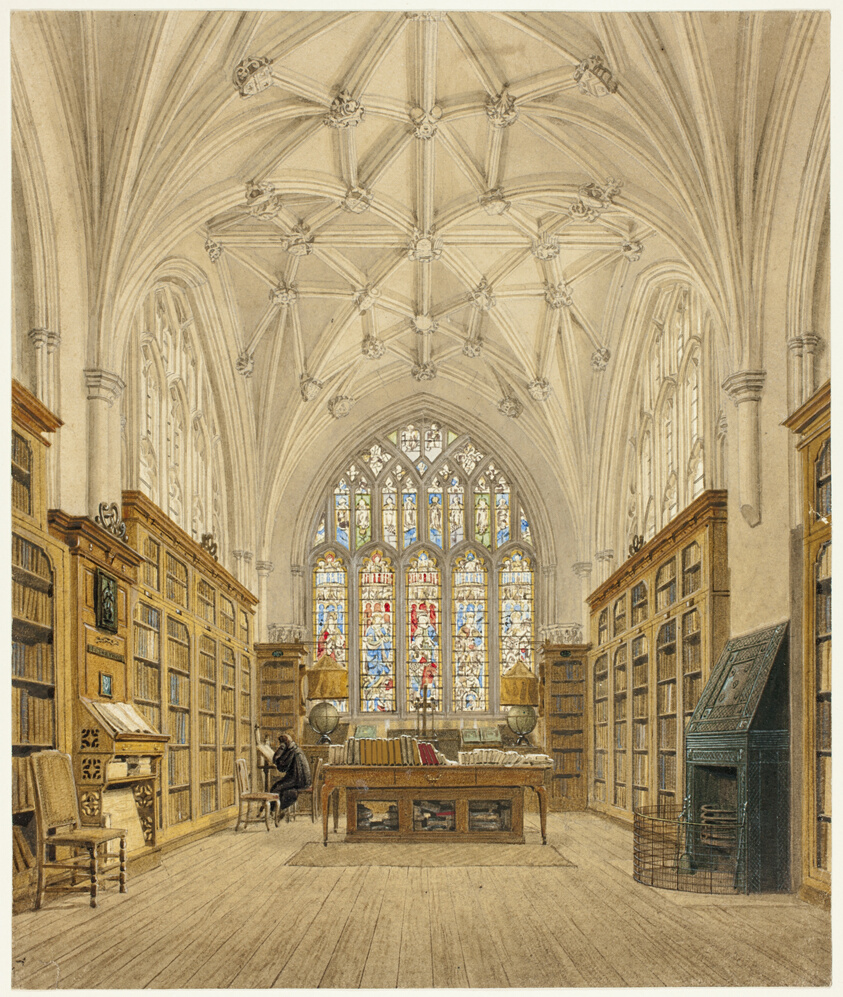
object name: Drawing and Watercolor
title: Library of Winchester College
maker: Frederick MacKenzie (English, born Scotland, 1787-1854)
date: c. 1816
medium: Watercolor, with touches of gouache, heightened with white gouache, over graphite, on cream wove paper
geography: England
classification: watercolor; drawings (visual works); prints and drawing